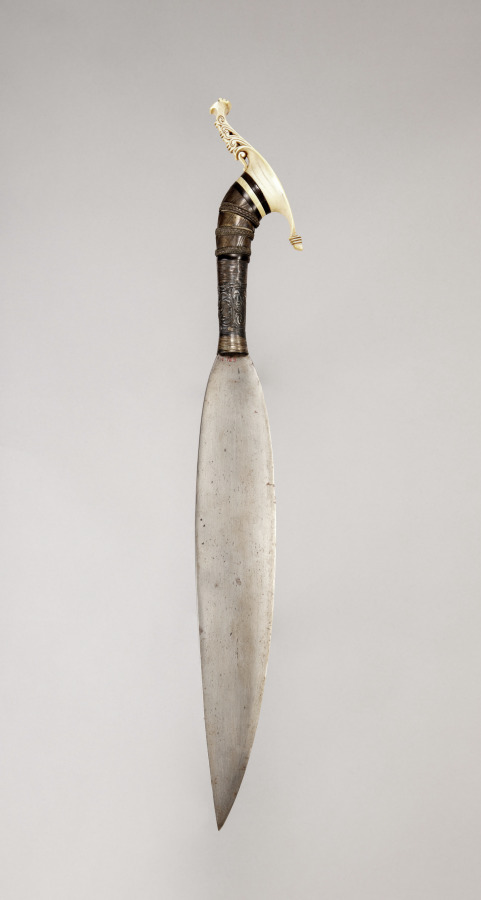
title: Sword (Barong)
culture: Philippines, Mindanao, Sulu Archipelago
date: before 1916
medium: Blade: metal; handle: metal with silver foil and repoussé work; pommel: ivory and carabao horn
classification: Arms and Armor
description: This sword has a broad, leaf-shaped blade characteristic of the Sulu Archipelago. Its profile suggests it was used for powerful cut-and-slash fighting. The hilt terminates in an exceptionally long ivory cockatoo (kakatua) pommel, carved with delicate okir scrollwork. This was an object of authority, status, and ceremonial presence within Tausug culture, probably owned by a member of the datu ruling class.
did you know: The ovular shape on the ivory pommel’s base marks where the nerve of the tooth was.